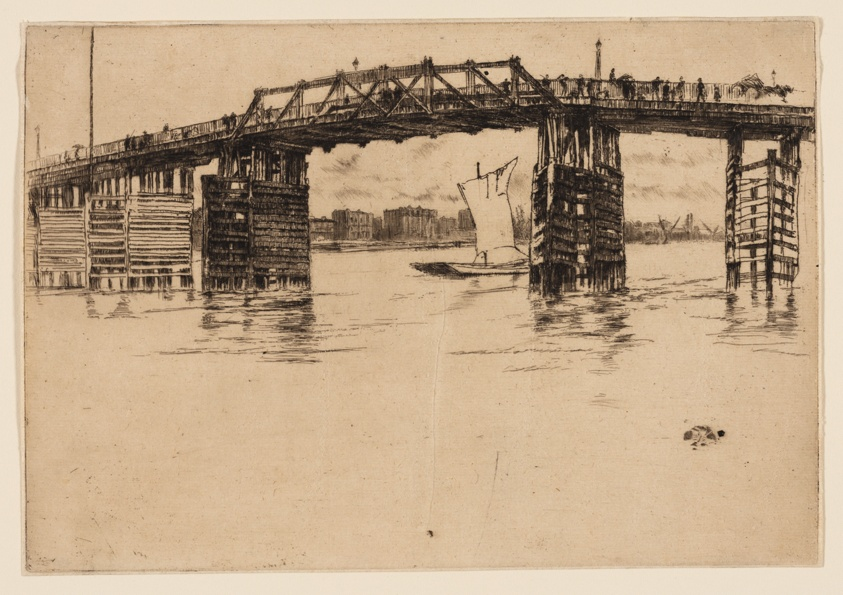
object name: Print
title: Old Battersea Bridge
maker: James McNeill Whistler (American, 1834-1903)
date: 1879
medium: Etching and drypoint in black ink on cream laid paper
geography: United States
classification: etching; drypoint; print; prints and drawing; paper